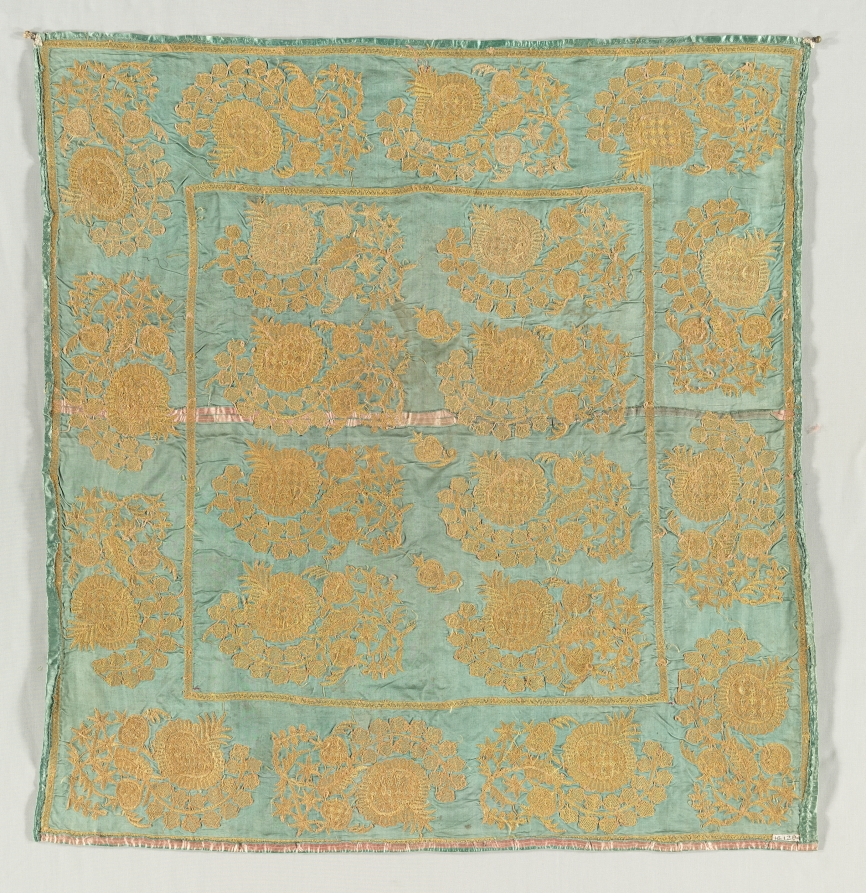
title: Embroidered envelope with closures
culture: Turkey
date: late 1700s to early 1800s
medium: satin weave: silk; embroidery, couched stitches: gilt-metal thread and cotton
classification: Embroidery